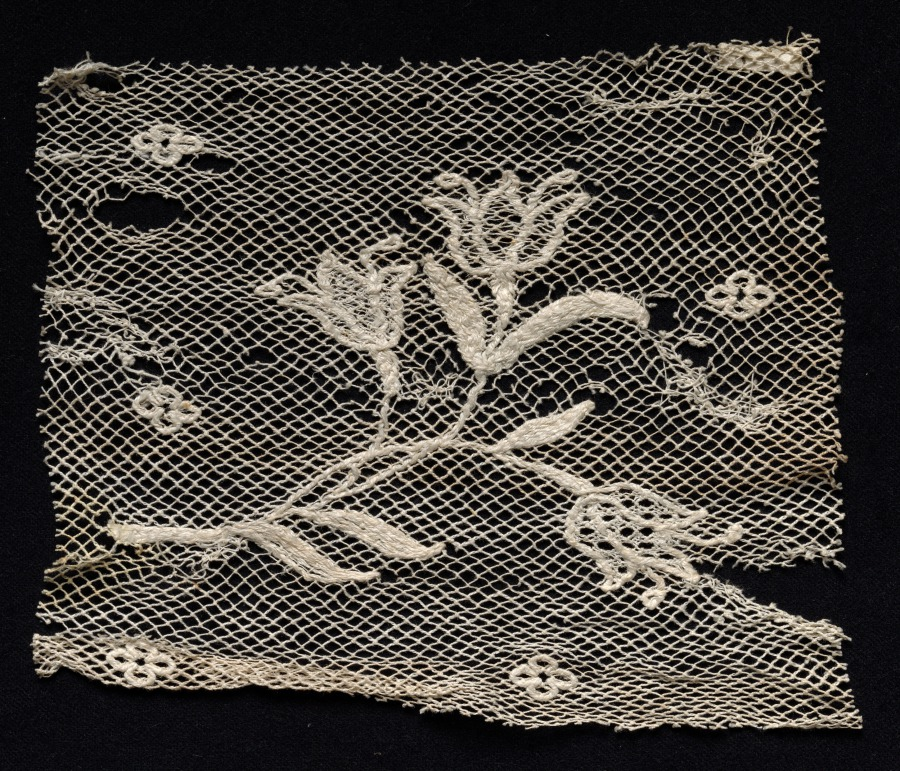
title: Fragment of a Band with Floral Motif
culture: Spain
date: 1700s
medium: Bleached linen (est.): needle lace, filet/lacis (knotted ground and darned in one direction)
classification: Lace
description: Though it is a small fragment, this piece of lace is simple and honest in its decorative quality. The focus is on the tulips, which stand out with thick darning against the unadorned diamond ground netting.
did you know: Myrta Leonora Jones, the donor of this work, was a women’s rights activist in Cleveland in the early 20th century.